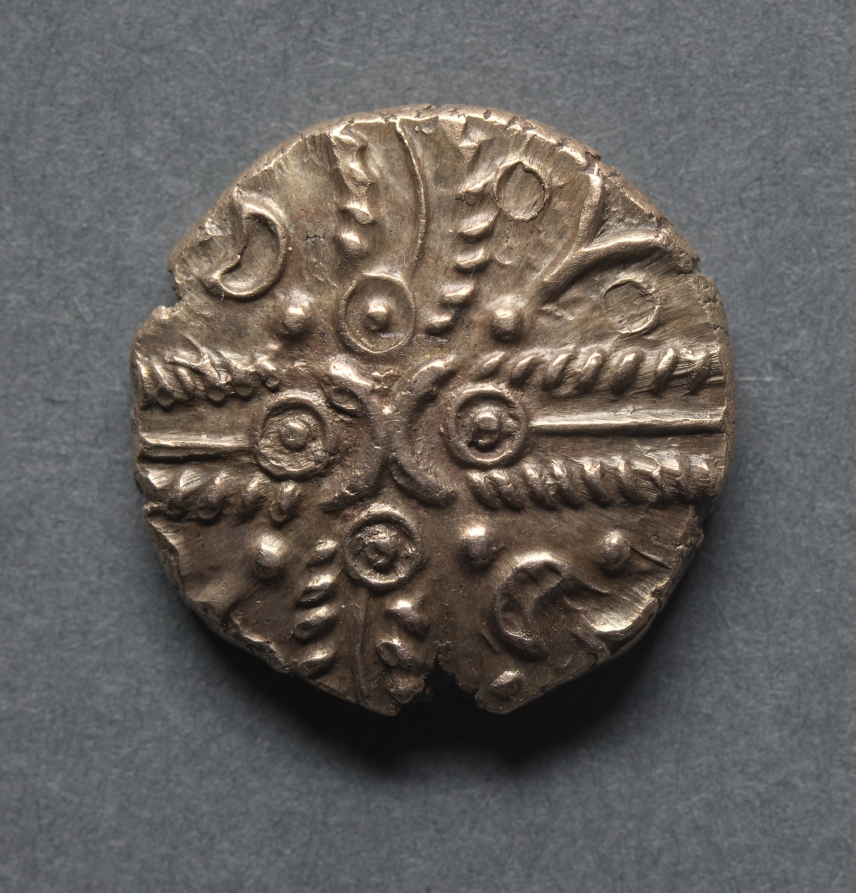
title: Tasciovanus Stater: Crossed Wreaths (obverse)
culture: England, Catuvellauni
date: 20 BCE–10 CE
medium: gold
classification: Coins